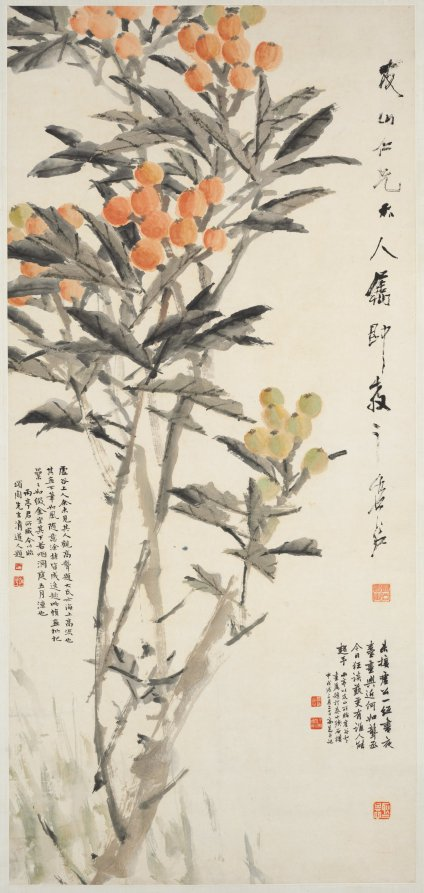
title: Pipa (Loquats)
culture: China, Yangzhou, Qing dynasty (1644-1911)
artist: Xugu (Chinese, 1823–1896)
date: c. 1888–89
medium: Hanging scroll; ink and color on paper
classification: Painting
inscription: 友山仁兄大人屬即教之，虛谷. [印]虛谷書畫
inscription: 未接虛公一經書2，夜臺畫興近何如。/ 聾丞今日狂談藝，更有誰人能起予。 雨亭以友山所貽虛谷和上畫屬，题於泰山殘石樓中，戊戌三日二十日，高邕并記。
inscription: 虚谷上人，余未見其人。觀高聾題大氏，亦海上高流也。其畫下筆如風，隨意涂抹，皆成逸趣。此幀畫枇杷纍纍如缀金，坐其下若咽洞庭五月涼也！ 雨亭君所藏，今以貽頌周先生。清道人題。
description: The loquat is a plant native to China that produces a juicy, yellow fruit in early summer. The artist may have intentionally extended the branches beyond the paper to emphasize the abundance of fruit. Xugu’s subjects of flowers, goldfish, and loquats express wishes for abundance and wealth, and must have appealed to his patrons. Xugu gave up his career as a military official during the Taiping rebellion (1850–64) and became an itinerant monk who painted for a living. He spent the later years of his life in Shanghai and his fame as an artist is associated with that city.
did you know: Xugu inscribed his painting on the right, dedicating it to a Mr. Youshan. Two additional inscriptions by other writers were added later, each time the painting changed owners.